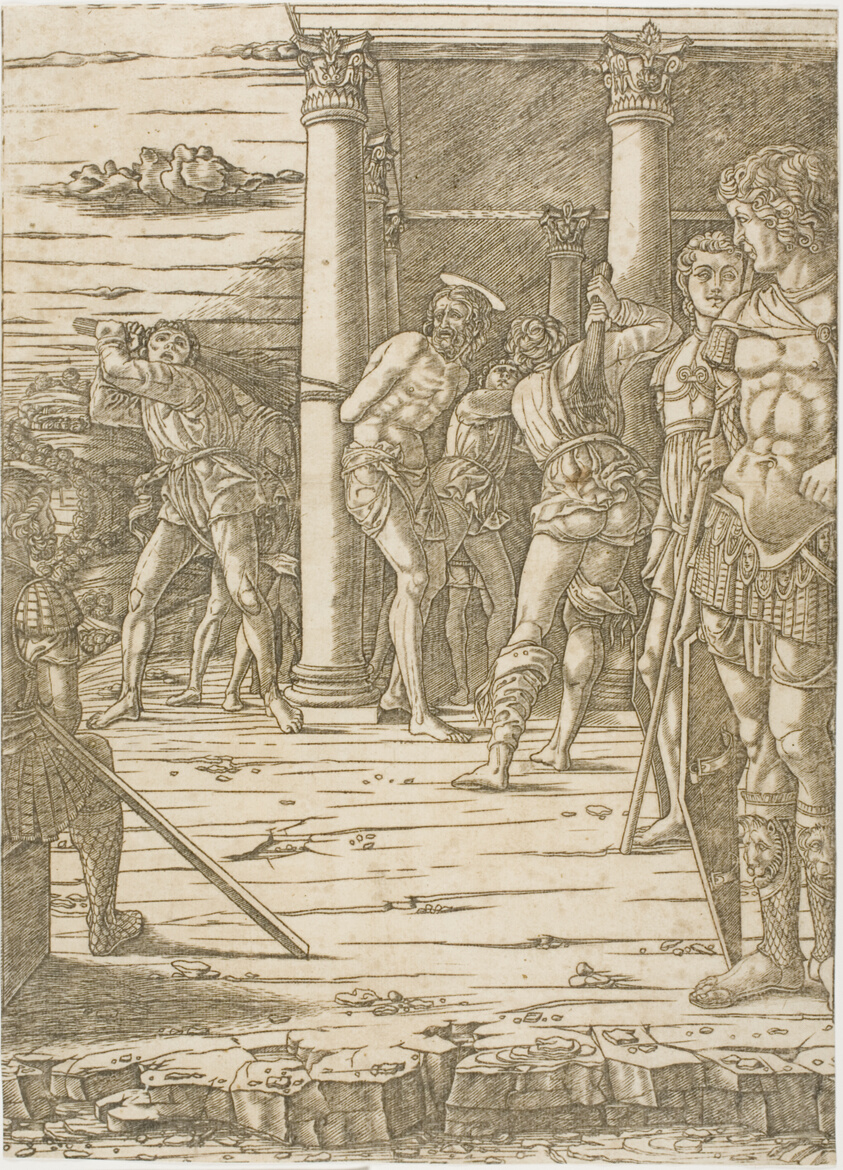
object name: Print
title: The Flagellation of Christ, with the Landscape Background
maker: Workshop of Andrea Mantegna; Italian, 1431-1506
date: 1475/80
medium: Engraving, on paper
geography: Italy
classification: engraving; print; prints and drawing